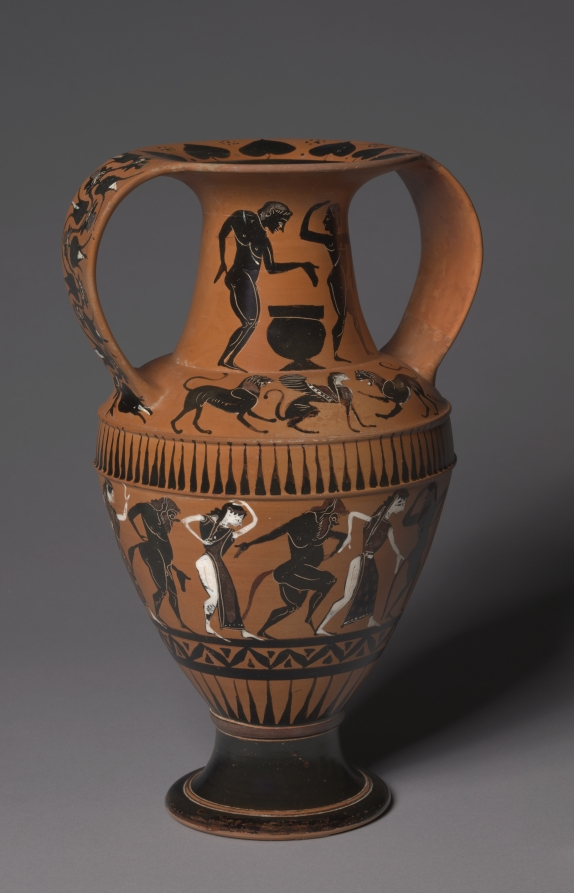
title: Black-Figure Nikosthenic Amphora (Storage Vessel): Dancing Youths; Sphinxes and Lions; Satyrs and Maenads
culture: Greek, Attic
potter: signed by Nikosthenes (Greek, Attic, active c. 545–510 BCE)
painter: attributed to Painter N, Thiasos Group (Greek, c. 530–510 BC)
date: c. 530–510 BCE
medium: ceramic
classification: Ceramic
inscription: inscription Under handle A/B:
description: The distinctive shape of this amphora—wide strap handles, conical neck, and ribs running around the upper body—is a trademark of the potter Nikosthenes, who signed his name below the partially restored handle (together with the verb EPOIESEN, for “made”). Nikosthenes signed nearly 150 surviving vases, more than any other named potter or vase-painter. Made in Athens with an Etruscan clientele in mind, Nikosthenic amphorae emulate precious metal and ceramic bucchero vases made in Etruria (central Italy), where many examples have been discovered. The painted figures include dancing youths (on the neck), sphinxes between lions (on the shoulder), and a continuous procession of dancing satyrs alternating with women (on the body).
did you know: The painter of this vase decorated nearly every available surface; the undecorated handle section is modern.